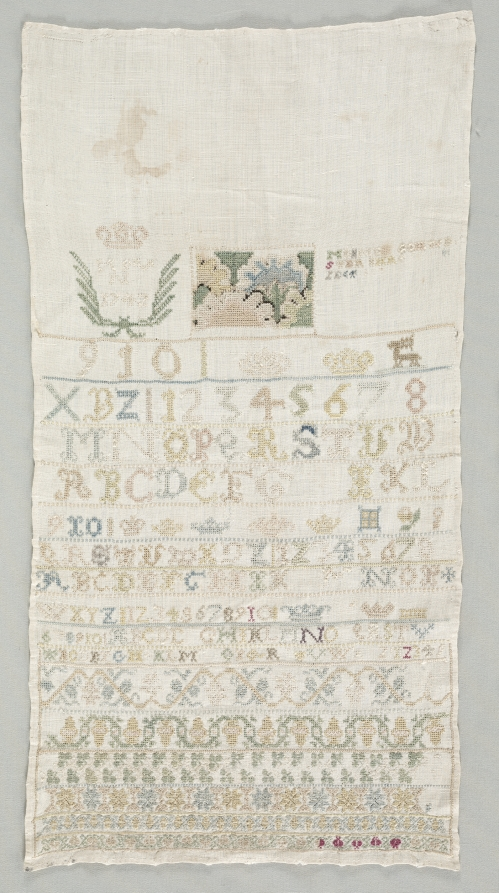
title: Sampler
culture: Germany, Mid 18th century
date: 1742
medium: silk embroidery on linen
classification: Sampler